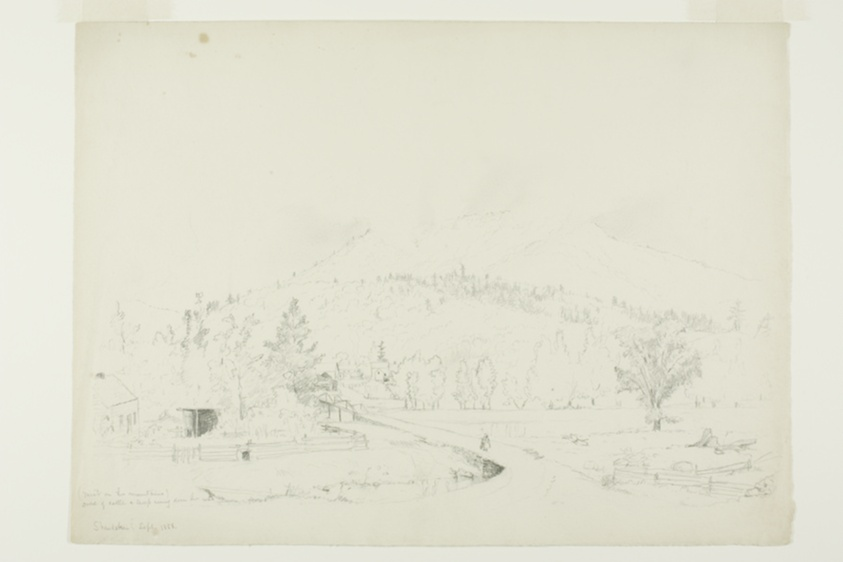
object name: Drawing and Watercolor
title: Mist on the Mountains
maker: Jervis McEntee (American, 1828-1891)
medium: Graphite on paper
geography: United States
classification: graphite; drawings (visual works); prints and drawing